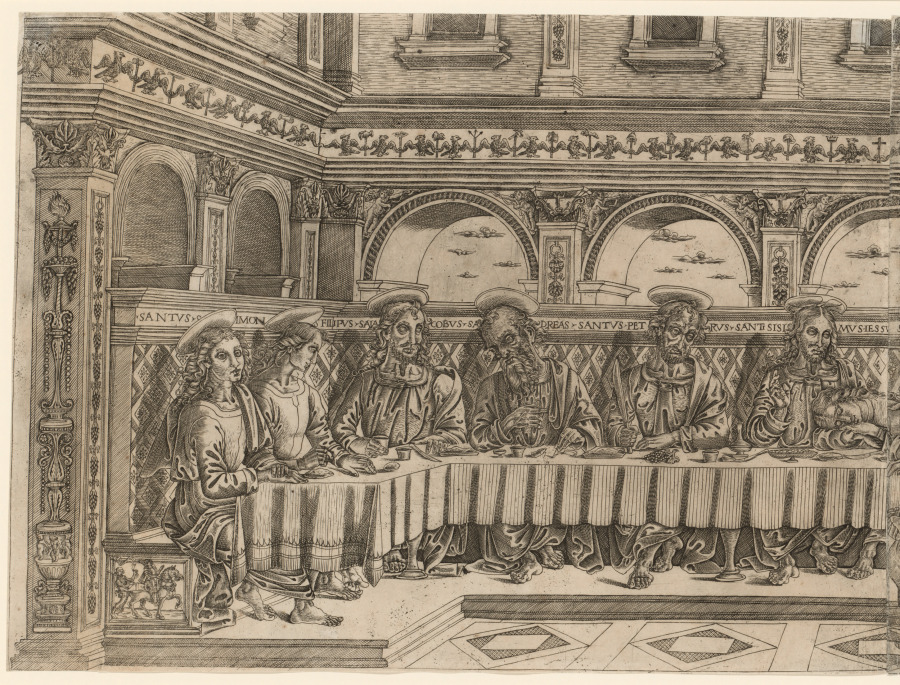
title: The Last Supper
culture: Italy, 16th century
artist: Lucantonio degli Uberti (Italian)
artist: after Perugino (Italian, c. 1450/55–1523)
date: c. 1500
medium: engraving on two sheets printed from two plates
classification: Print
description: Because large prints were often displayed on a wall, they were susceptible to damage and often have not survived. This large print of the Last Supper, however, is in excellent condition. It was engraved on two plates and printed on two separate sheets of paper. The composition is believed to be a fairly close copy of a fresco by Perugino in the convent of San Onofrio in Florence, around 1495. The scene is set within an arched interior embellished by a frieze of eagles and by half pilasters with floral decorations and putti. Fluffy clouds are visible beyond the archways. Christ and the apostles are on a bench arranged behind the table. Judas, instead, sits on a stool in the middle of the room, looking over his shoulder towards the viewer. The engraver included two reliefs at both ends of the bench. The panel on the right shows Judas with four soldiers, while the one on the left features a knight, a squire, and a banner. On it, the letters LVC . . . TNO have been interpreted as the artist's signature.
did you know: This print is the only known impression of the entire composition. A copy with only the right side is preserved today at the British Museum in London.